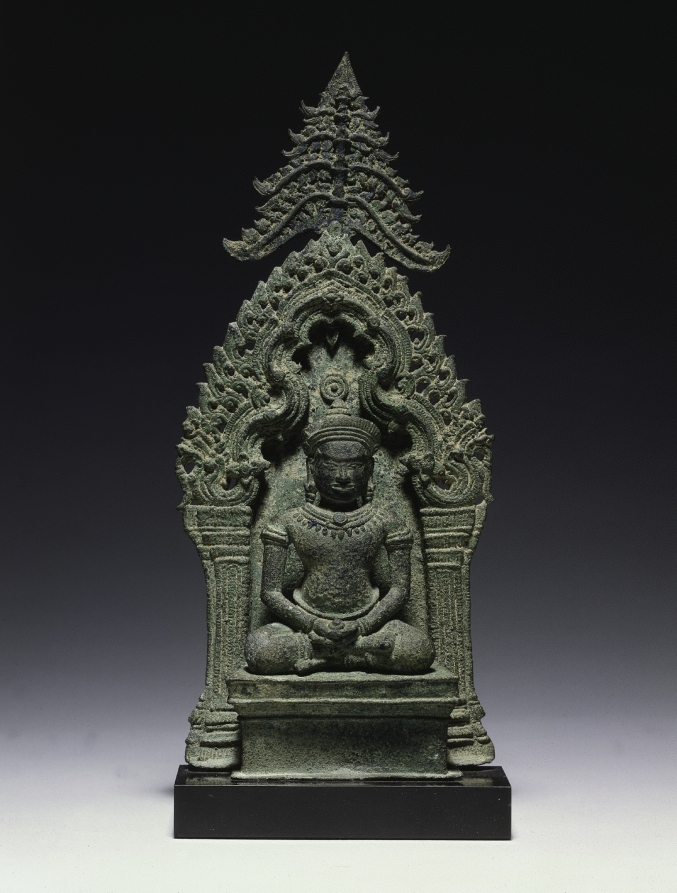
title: Altarpiece with Buddha Enthroned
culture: Cambodia, found in Vietnam, near Ho Chi Minh City, Reign of Suryavarman II, Angkor Wat Period, 1st half 12th Century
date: mid-1100s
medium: bronze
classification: Sculpture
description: The crown and jewels of this Buddha indicate that he is a transcendent Buddha, not the historical Buddha who lived in the 5th century BCE. Small-scale bronze images of transcendent Buddhas were used in tantric practices as personal meditation images or in ritual settings. Tantric Buddhism was adopted as the state religion during the 12th century in the region of Angkor. A depiction of the tree that references the moment of the Buddha’s enlightenment is above the scalloped serpentine form of the niche under which he sits enthroned on an altar. An object interpreted as a lotus bud rests on the hands in his lap as he sits in a posture of meditation.